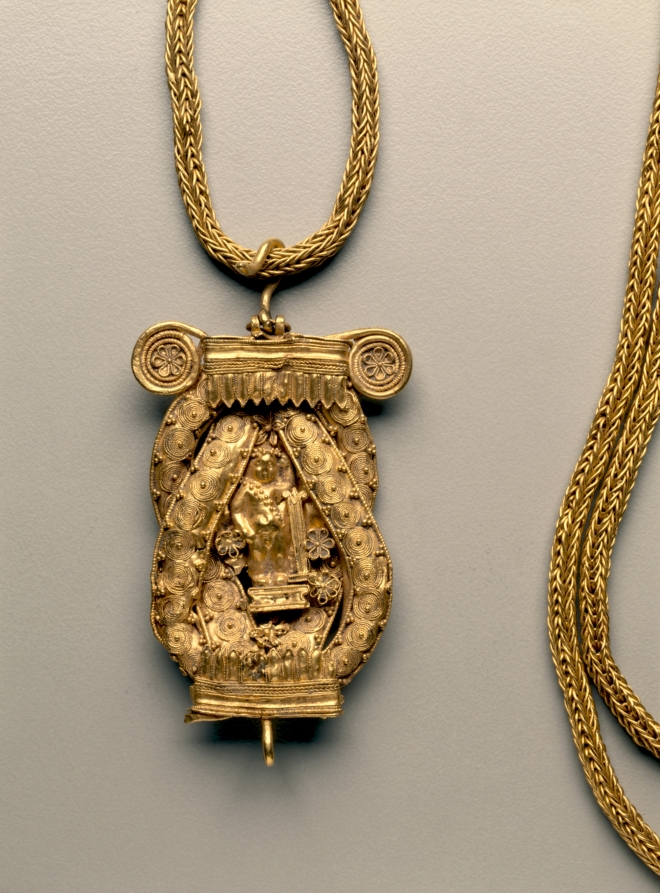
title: Chain and Pendant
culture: Greece, Hellenistic period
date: 200s BCE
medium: gold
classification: Jewelry